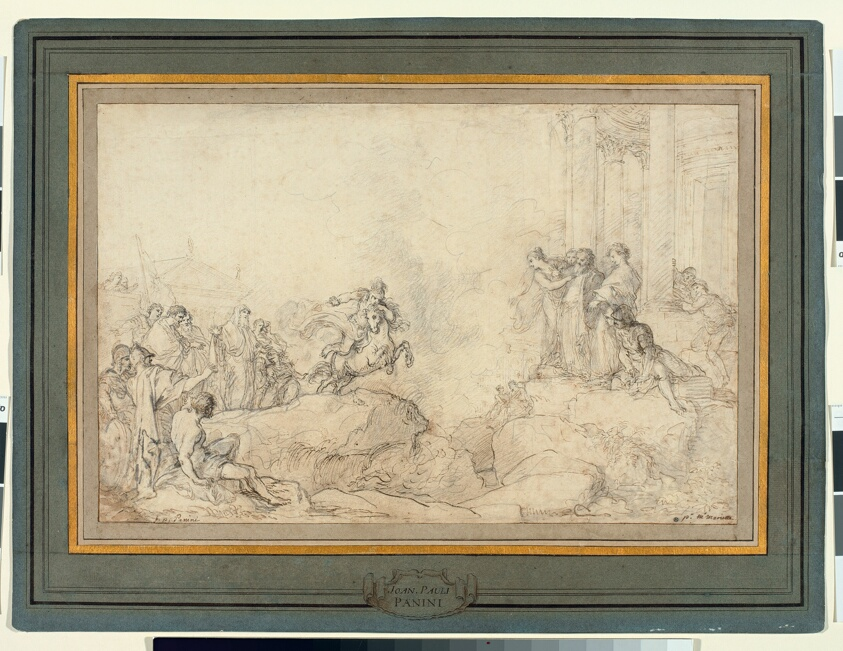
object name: Drawing and Watercolor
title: Marcus Curtius Leaping into the Chasm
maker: Giovanni Paolo Panini (Italian, 1691–1765)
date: c. 1718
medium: Pen and brown ink and iron-gall ink, brush and black and gray ink, and black chalk, on ivory laid paper, laid down on cream laminate card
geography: Italy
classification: drawings (visual works); brush and ink; chalk; paper; pen and ink drawings; prints and drawing